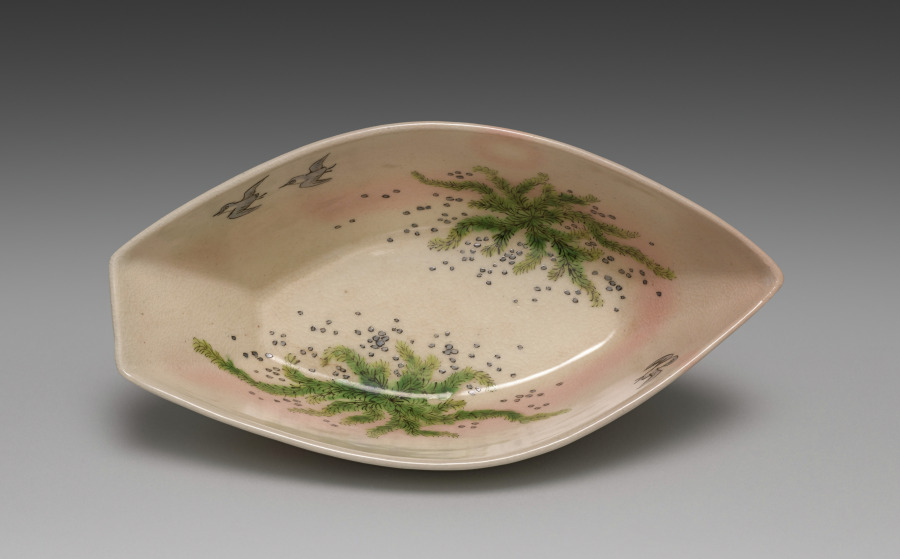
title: Boat-Shaped Bowl with Plovers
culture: Japan, Meiji period (1868–1912)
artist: Seifū Yohei III (Japanese, 1851–1914)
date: 1893–97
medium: Stoneware with crackled glaze and overglaze color enamel and gold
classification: Ceramic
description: Overglaze color enamels create a seascape made complete by the bowl’s boat shape. The bowl’s form inserts a human presence into the scene, much in the way rusu mōyō is used in paintings to suggest people just out of view. Rusu mōyō is a pictorial device by which the presence of someone physically absent from an image is conveyed through the depiction of clothing or other items. The inside of the bowl has a scene of plovers flying through the sky over a profusion of seaweed in sand below. In addition to the black, gray, and green of the overglaze elements, warm pink banding and mottling in the clay come through the glaze and are remarkably effective at suggesting the seashore.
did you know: On the outside of the bowl, on each side, birds fly about grasses in search of a meal.